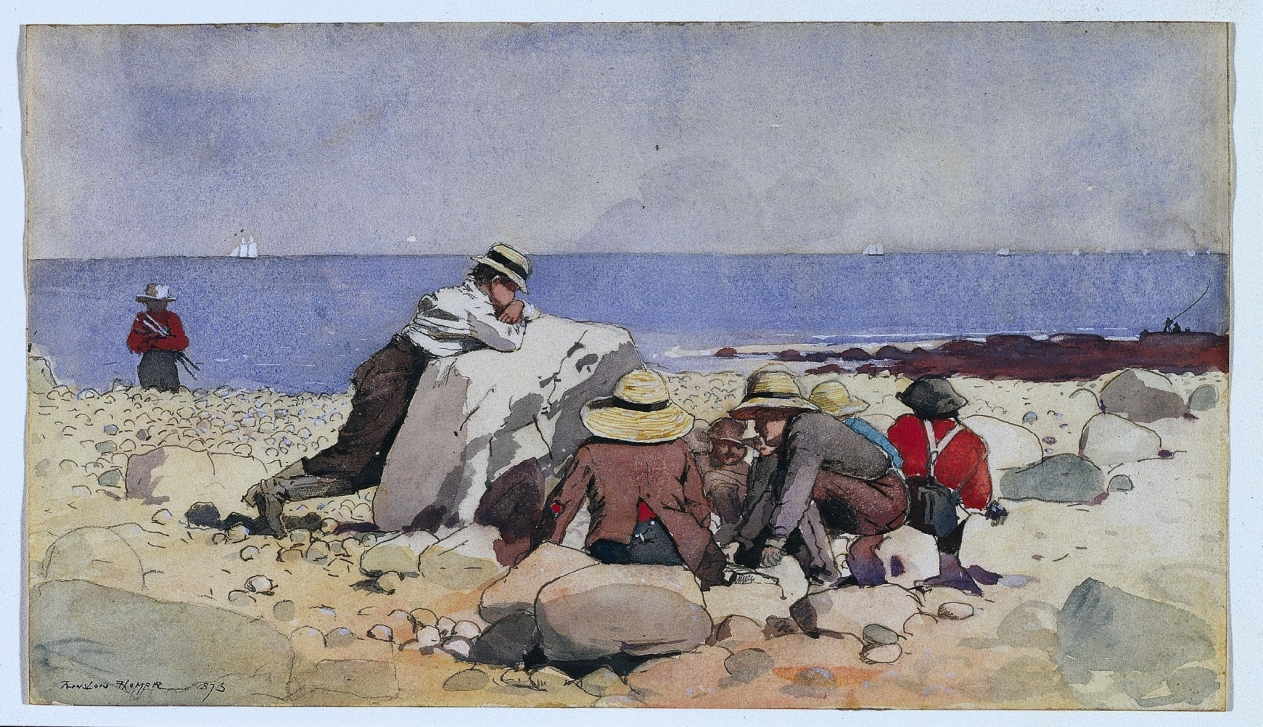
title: A Clam-Bake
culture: America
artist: Winslow Homer (American, 1836–1910)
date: 1873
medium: watercolor, gouache, and graphite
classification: Drawing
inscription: signed, lower left, ing black ink: WINSLOW HOMER 1873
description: During the first part of his career, Winslow Homer supported himself as an illustrator, but in the early 1870s he found that he could make a good living through the sale of his watercolors. His early watercolors, such as this one of boys on a beach at Gloucester, Massachusetts, show a tentative use of the technique and often have the effect of colored line drawings. Homer later combined the composition of this watercolor with other sketches to produce the illustration A Clam-Bake, which appeared in Harper's Weekly on August 23, 1873.